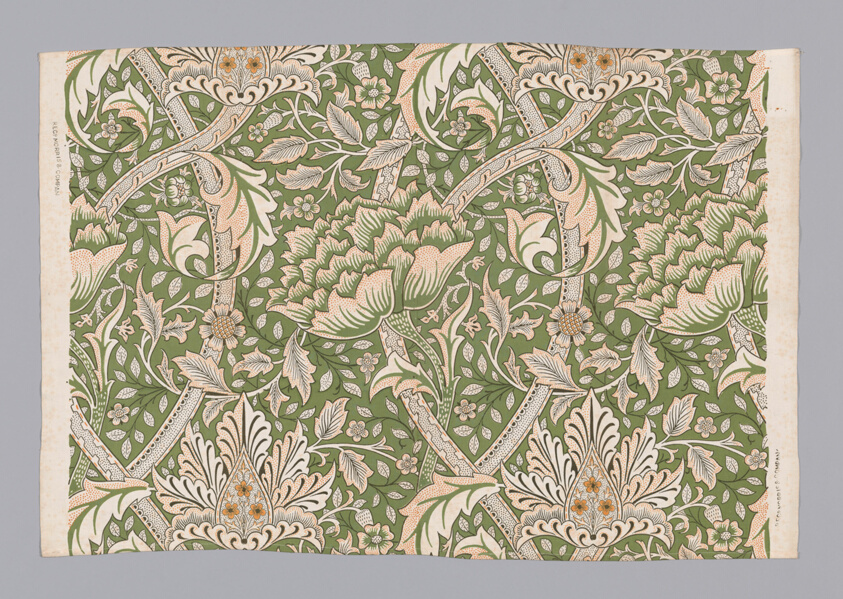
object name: Textile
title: Windrush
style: Arts and Crafts Movement, british, 19th century, 20th Century, British Arts and Crafts Movement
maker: Designed by William Morris (English, 1834–1896); Produced by Morris & Co., London (English, 1875–1940); Merton Abbey, London (English, 1881–1940)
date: Design 1883, made 1917–25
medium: Cotton, plain weave; block printed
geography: England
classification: textile; weaving - printed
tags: foliage, floral, botanical